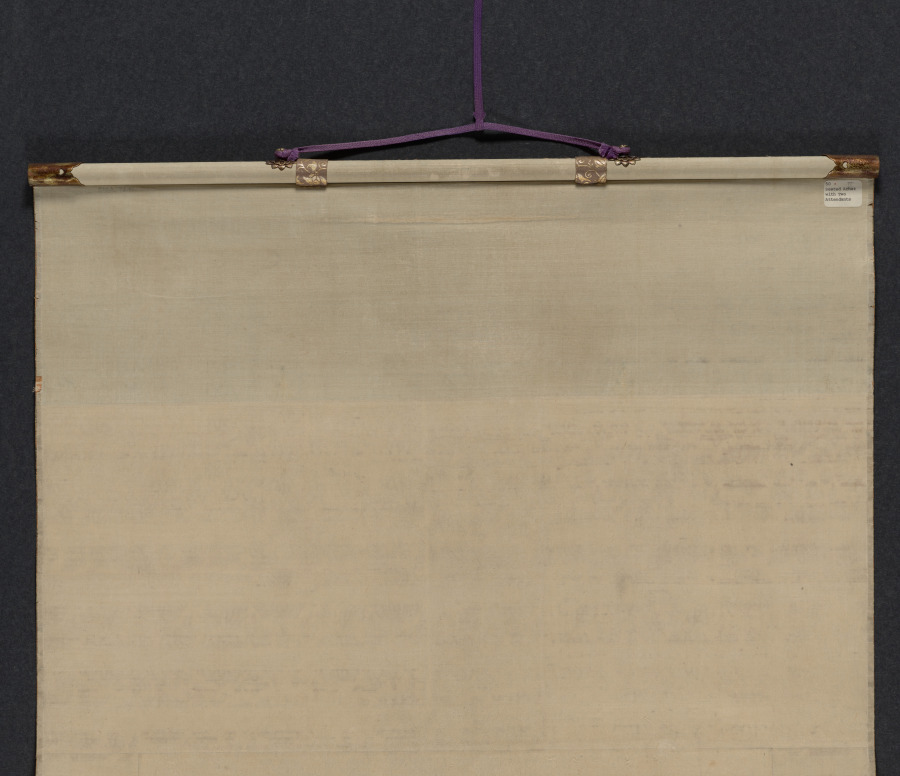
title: Seated Arhat with Two Attendants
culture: China, Southern Song dynasty (1127-1279)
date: late 1200s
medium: Hanging scroll; ink and color on silk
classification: Painting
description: Arhat, or Lohan (羅漢 in Chinese), were the disciples of the historical Buddha. Later tradition tended to picture them in sets of 16, 18, or as many as 500. This is one painting from a larger set, with a seated arhat portrayed on a grand scale, overshadowing his own attendant as well as the ferocious figure who approaches him with an offering of a wild goose.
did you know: The arhat holds a rolled up scroll, likely a sutra, and is seated before a standing screen decorated with a landscape painting.